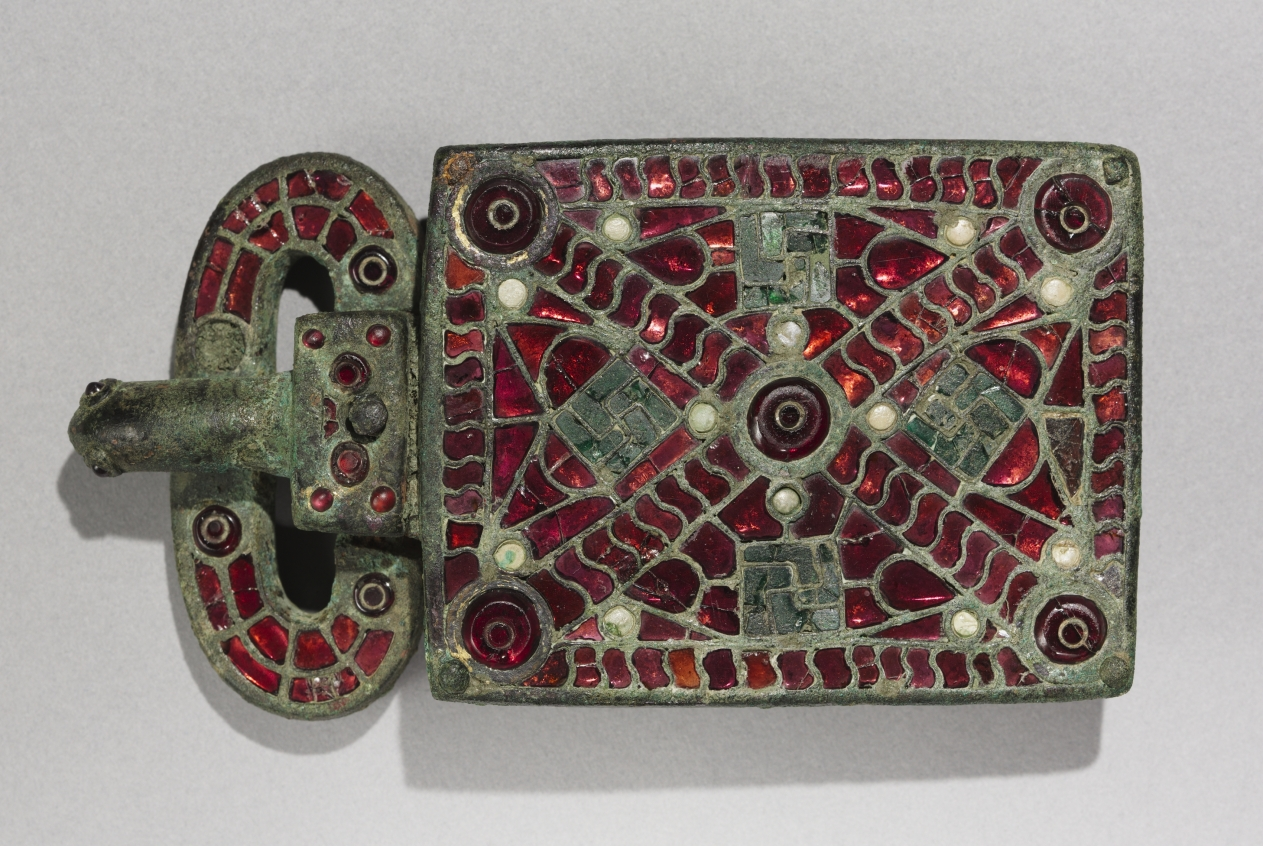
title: Belt Buckle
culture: Visigothic, Spain, Migration Period, 6th century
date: c. 525–560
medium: bronze with garnets, glass, mother of pearl, gold foil, traces of gilding; bronze and glass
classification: Jewelry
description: The art of the European Migration Period (3rd-7th centuries AD) is almost exclusively one of personal adornment-a portable art that followed men and women to their graves. Belt buckles with large rectangular attachment plates have been discovered in cemeteries across the Iberian Peninsula-now occupied by Spain and Portugal-from the period of Visigothic occupation (about AD 412-711). Their decoration varies. Finer examples, like this one, are distinguished by brilliantly inlaid semi-precious stones and colored glass. Garnets were especially prized in Visigothic society for use in cloisonné jewelry. The technique involved the fitting of carefully cut pieces of polished garnet into an intricate grid of compartments, or cloisons. This buckle is so densely inlaid with garnets that it presents a virtual "carpet" of red to the eye. These large Visigothic buckles are strikingly uniform in shape yet endlessly varied in surface design, perhaps a sign that they expressed the personal identities of their original owners. Grave excavations have shown that belt buckles of this type were made for women.